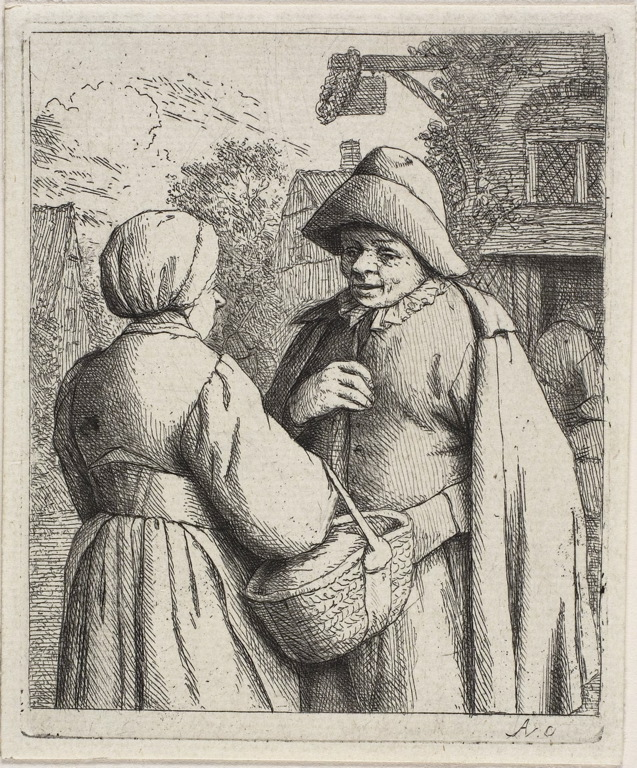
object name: Print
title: Man and Woman Conversing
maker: Adriaen van Ostade (Dutch, 1610-1685)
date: c. 1671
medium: Etching in black on ivory laid paper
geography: Holland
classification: etching; print; prints and drawing